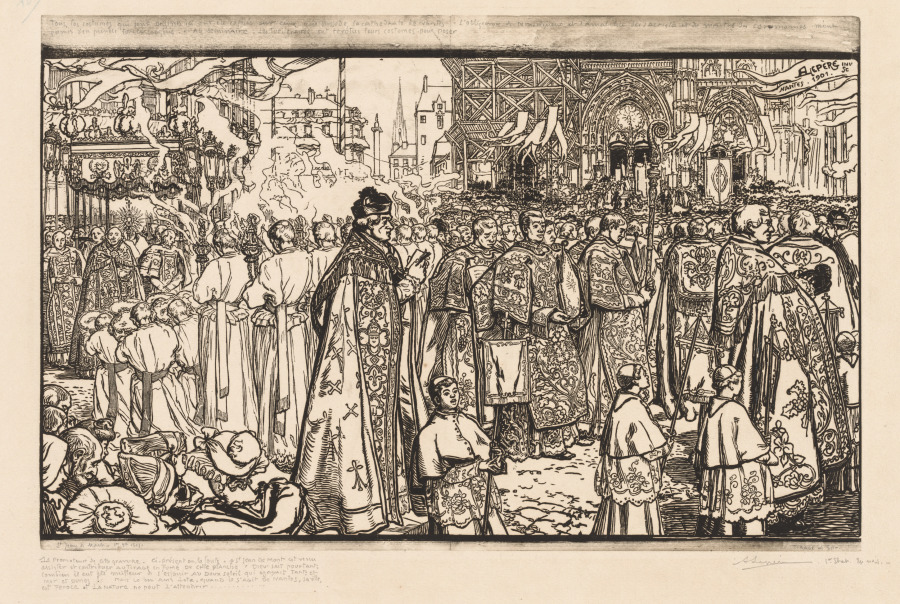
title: La Procession de la Fête-Dieu à Nantes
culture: France, late 19th-early 20th Century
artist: Auguste Louis Lepère (French, 1849–1918)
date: 1901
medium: woodcut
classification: Print